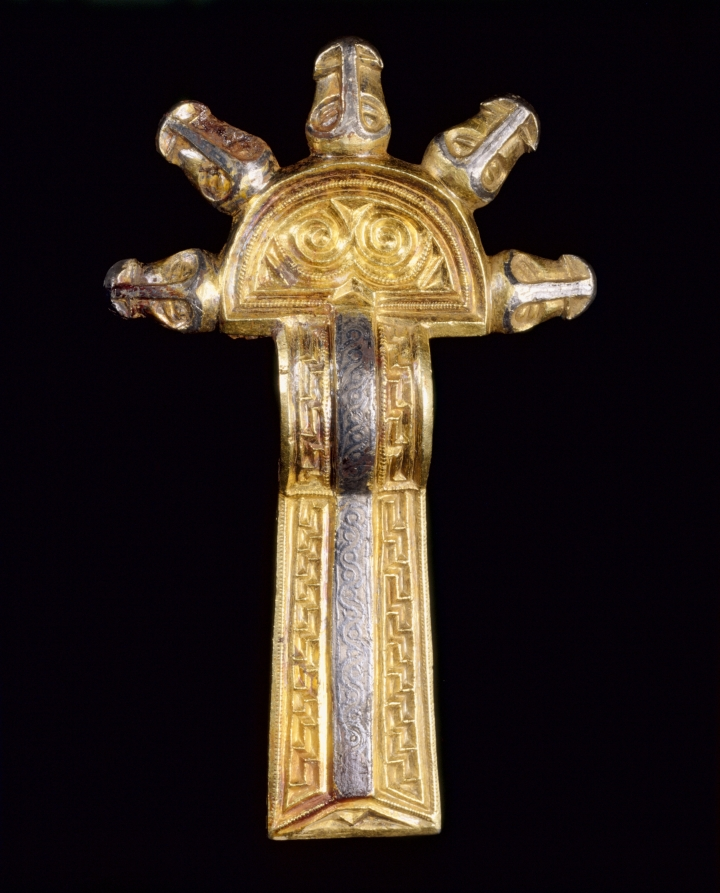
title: Fibulae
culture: Alemannic, Migration Period, 6th-7th century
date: 500s-600s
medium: cast silver, parcel-gilt, with niello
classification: Jewelry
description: A woman of high rank might have worn these twin fibulae on her shoulders, one fastening her inner garment on the right, the other her outer garment on the left. She might also have suspended them from her belt as decorative ornaments